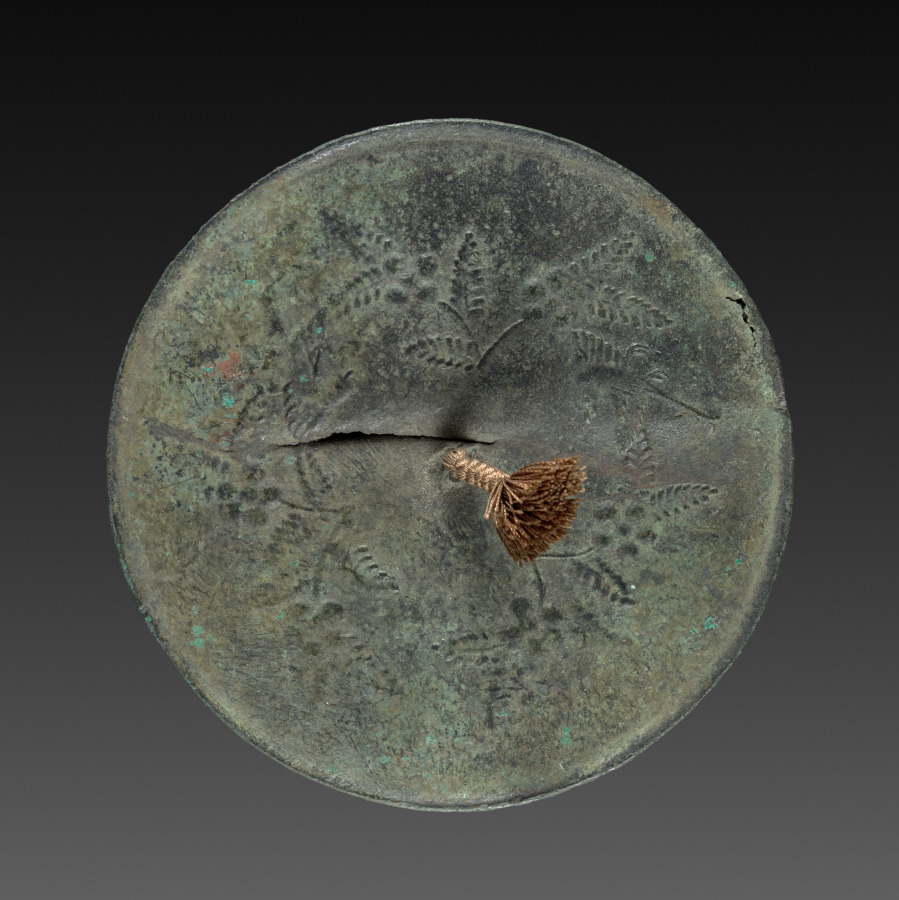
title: Mirror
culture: Japan, Heian period (794–1185)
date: 794–1185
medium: bronze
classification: Metalwork